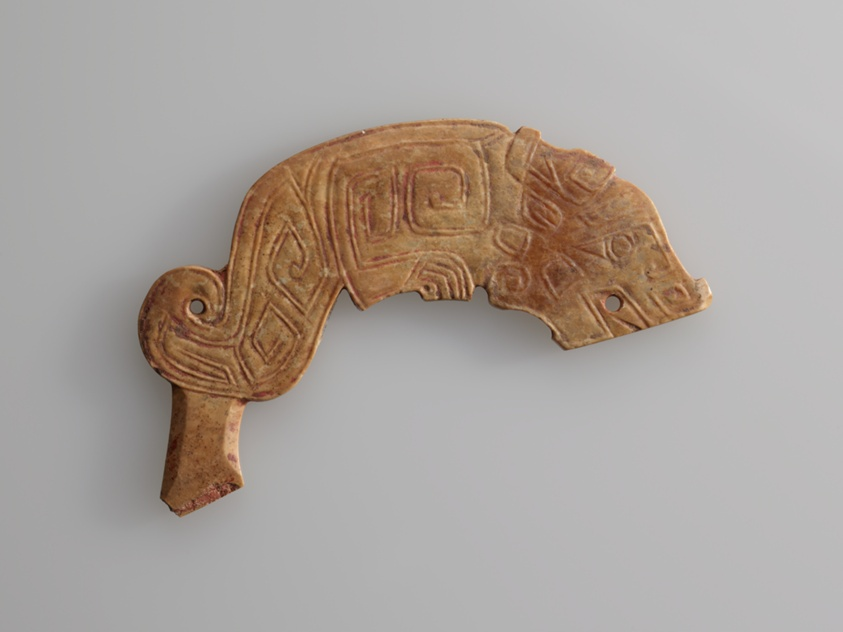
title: Pendant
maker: China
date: Shang dynasty (c. 1600–1050BC)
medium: Jade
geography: China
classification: jade; asian art